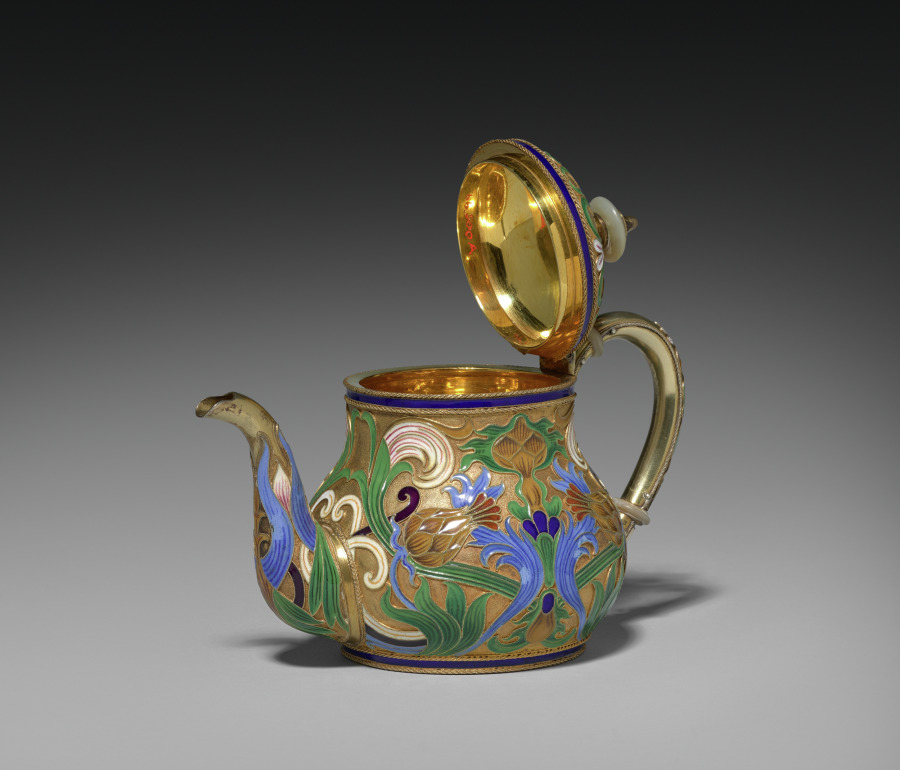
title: Covered Teapot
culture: Russia, St. Petersburg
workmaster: attributed to Feodor Ivanovich Rückert (Russian, 1840–1917)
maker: House of Fabergé (Russian, 1842–1918)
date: 1887–96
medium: silver gilt, opaque cloisonné enamel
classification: Miscellaneous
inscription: 84, St. George [assay mark for Moscow, 1882-1896]; C. Fabergé (in Cyrillic); double-headed eagle [imperial warrant]; St. George; initials of Carl Fabergé (in Cyrillic).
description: Fabergé’s craftsmen in Moscow, especially under the watchful eye of workmaster Feodor Rückert, became known for their work in the pan-Slavic or neo-Russian style, hearkening back to 17th-century motifs of Russian folk art. Often on rather conventional shapes, Rückert and his silversmiths created an explosion of color, achieved through the historic technique of cloisonné enamel in which tiny metal lines are soldered to the surface then filled with glass powders in various colors and fired to create a high gloss finish. The result is a spectacular evocation of the 17th-century originals. Far from mere copies, however, Rückert's designs, such as this tea service, employ naturalistic or abstract motifs in a thoroughly modern adaptation of a remarkable earlier period of Russian art and decoration.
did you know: This covered teapot is part of a larger tea service.